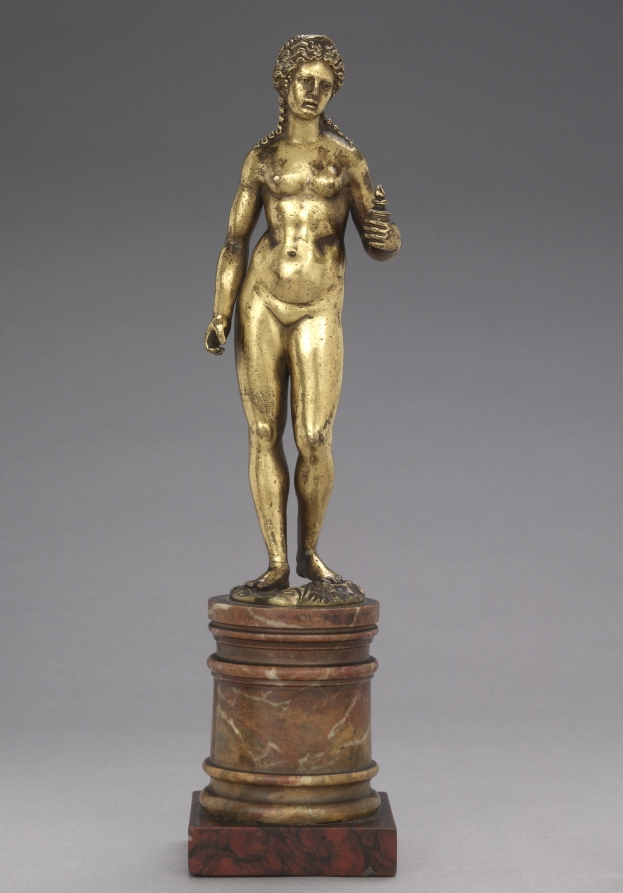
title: Venus with a Burning Urn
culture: Northern Italy, 16th century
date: c. 1500–1520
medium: gilt bronze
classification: Sculpture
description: Venus is the Roman goddess of many virtues, including Love, Charity, Fertility, and Victory. Here, Venus is represented as the goddess of Charity. She wears a crown, as Charity is often depicted as the Queen of the Virtues. The flaming lamp in Venus's left hand was also a symbol of Charity in Venice, where this piece is thought to have originated. The bent fingers of her right hand are bent suggest that Venus may have once held another object. Renaissance sculptors often looked back to antiquity when producing monumental and small bronze statues. The small bronze cabinet piece comes into Italian art during this time, bringing ancient gods and goddesses into Italian households. Venus stands in a contrapposto pose and, like Hellenistic and Roman objects, her locks are tied by a double ribbon while two curls fall on her shoulders. Her tilted head and large emotional eyes, as well as her small nose and parted lips reflect the influence of Hellenistic Greek facial styles.